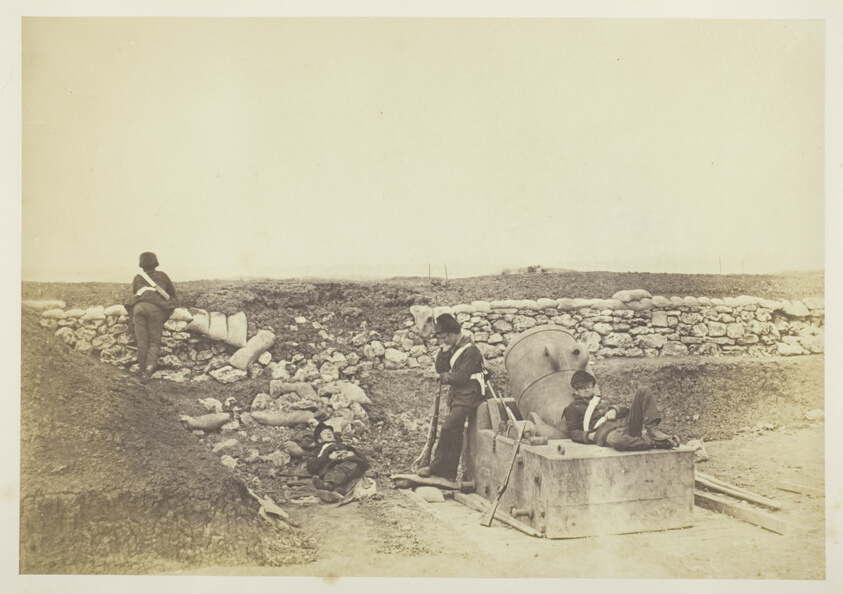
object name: Photograph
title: A Quiet Day in the Mortar Battery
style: 19th century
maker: Roger Fenton (English, 1819–1869)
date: 1855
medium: Salted paper print, plate 7 from the album "Photographs Taken in the Crimea" (1856)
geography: England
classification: salted paper print; photographic process; photography; photograph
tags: Collected by Hugh Edwards, Crimea 1856